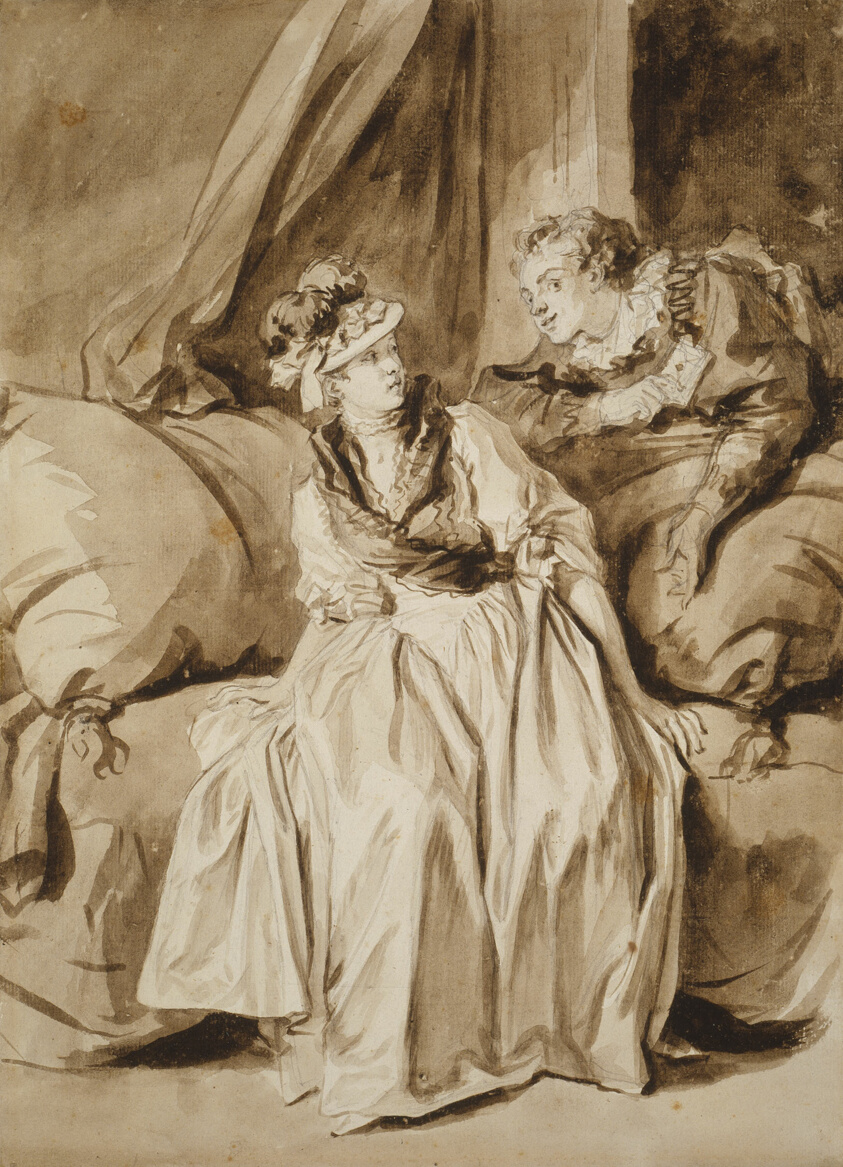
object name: Drawing and Watercolor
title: The Letter, or The Spanish Conversation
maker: Jean-Honoré Fragonard; French, 1732-1806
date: c. 1778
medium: Brush and brown ink and brush and brown wash, with graphite, on ivory laid paper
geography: France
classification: ink or chalk wash; drawings (visual works); prints and drawing; paper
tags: women, hats, men, love letters, interiors